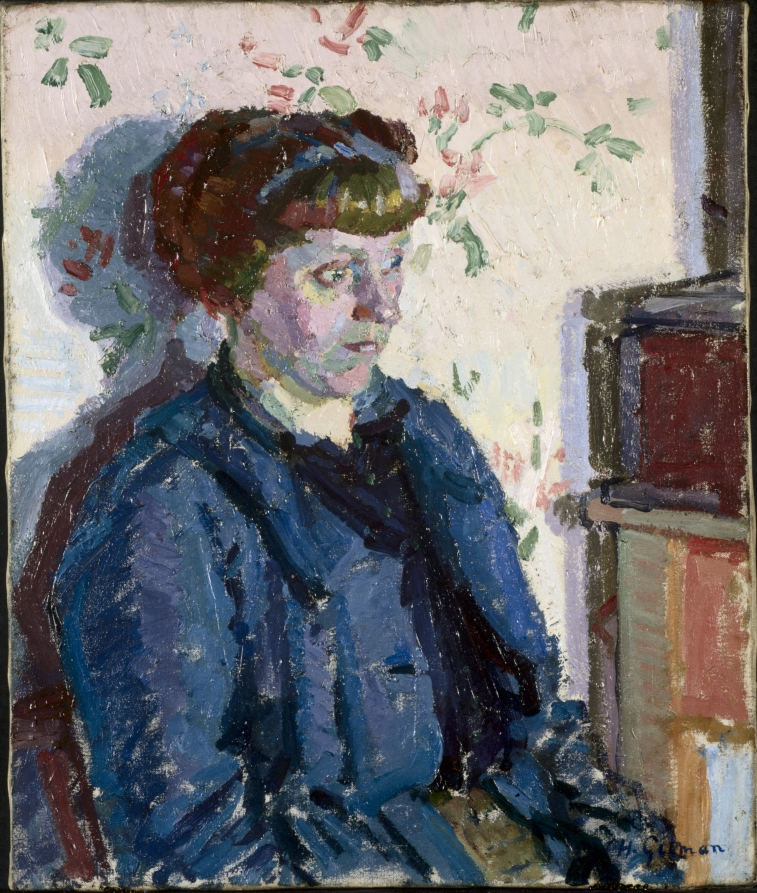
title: Sylvia Gosse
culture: England, 20th century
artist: Harold Gilman (British, 1876–1919)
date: c. 1913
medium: oil on canvas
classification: Painting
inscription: signed lower right: H. Gilman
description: Sylvia Gosse, the sitter for this painting by British artist Harold Gilman, was also an artist, specializing in etching. She was also known for being somewhat introverted. Does she seem to reveal any of her personality in this portrait?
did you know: Gilman discovered his passion for art after a major fall led to a hip injury that left the young artist-to-be confined to his bed where he began to sketch.